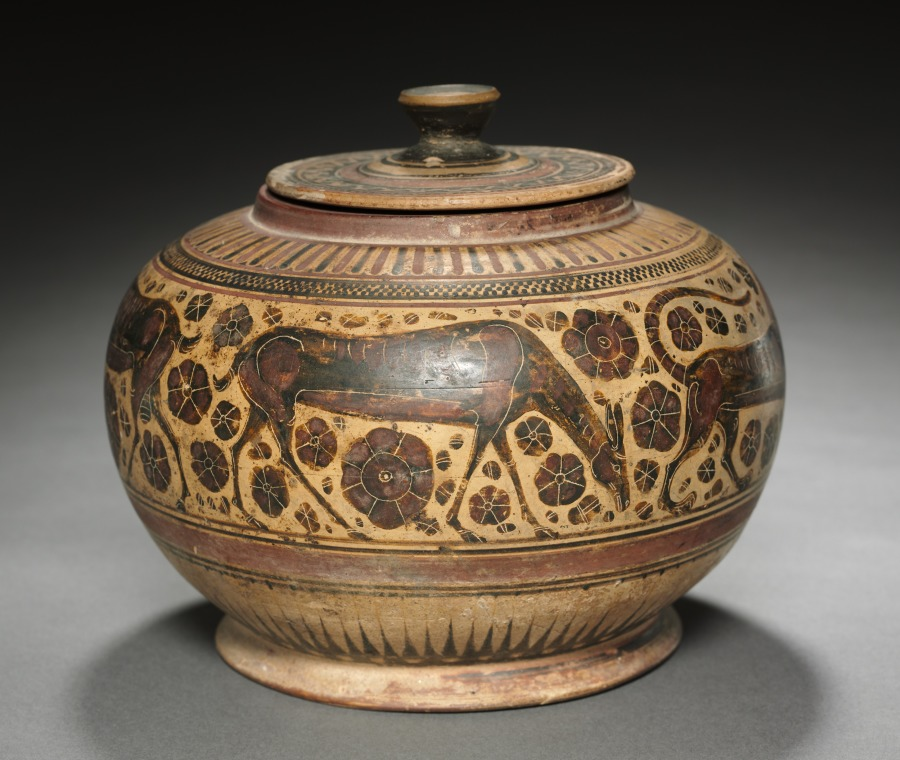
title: Black-Figure Pyxis (Cylindrical Lidded Box): Animals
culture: Greek, Corinthian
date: 600s–500s BCE, with modern painting and incision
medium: ceramic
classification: Ceramic